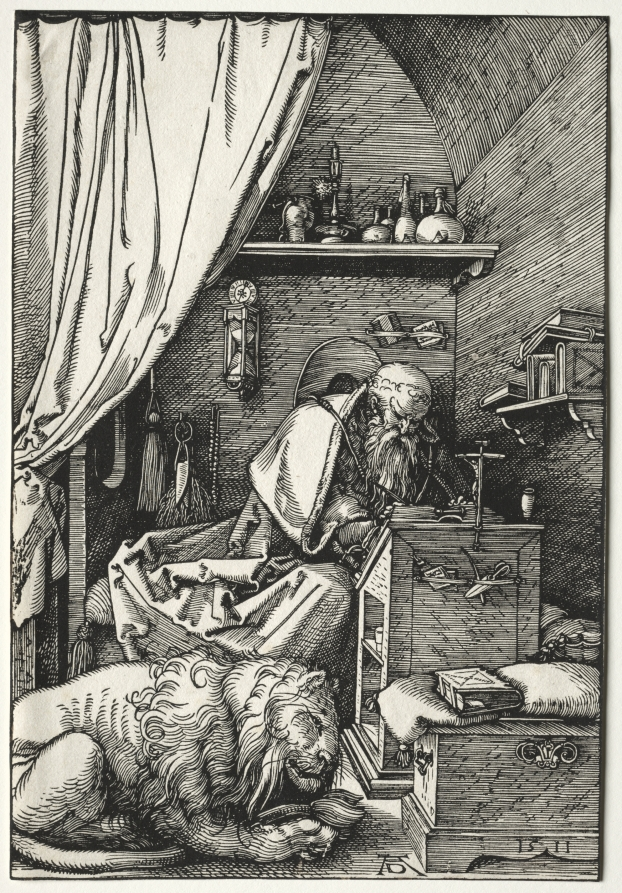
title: St. Jerome in His Cell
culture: Germany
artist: Albrecht Dürer (German, 1471–1528)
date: 1511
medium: woodcut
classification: Print